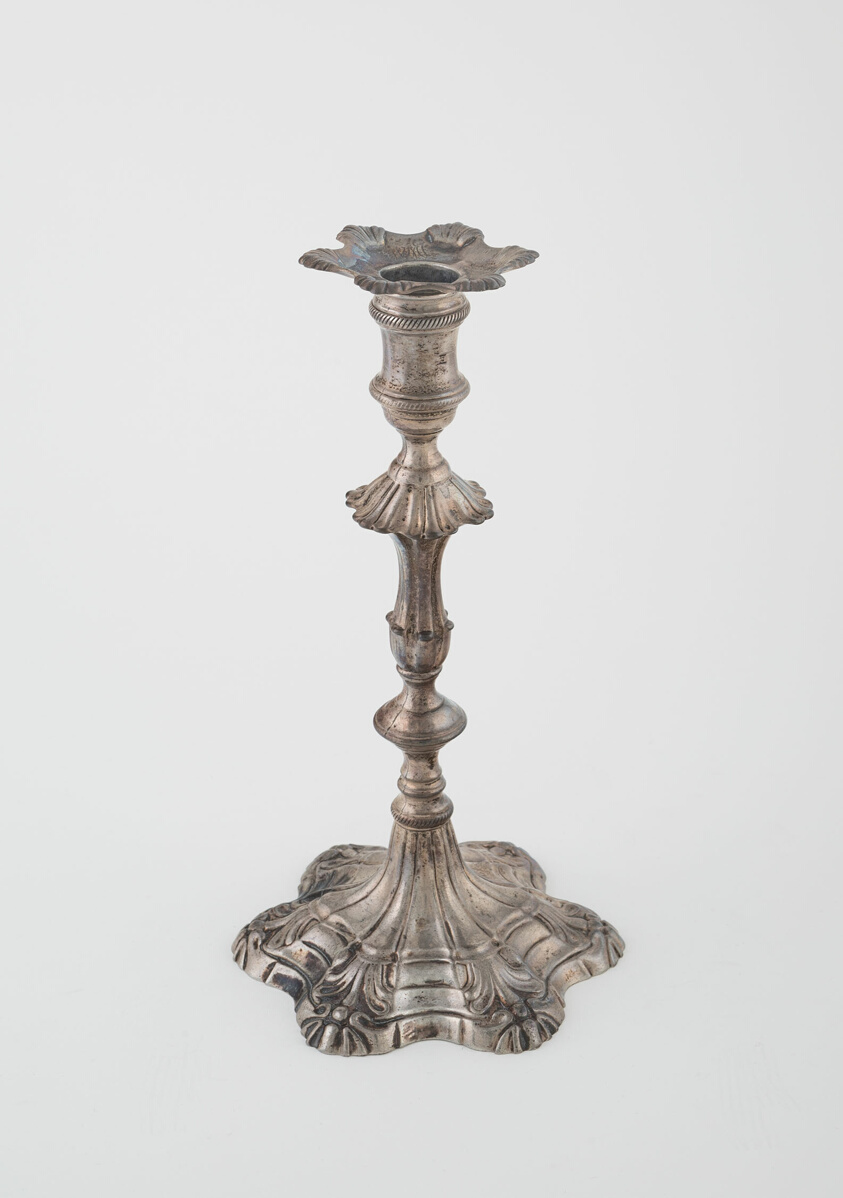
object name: Metalwork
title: Candlestick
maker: Probably Ebenezer Coker; English, 1738-1783; London, England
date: 1762/63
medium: Silver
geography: London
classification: candleholder - candlestick; candleholder; silver; metalwork; european decorative arts